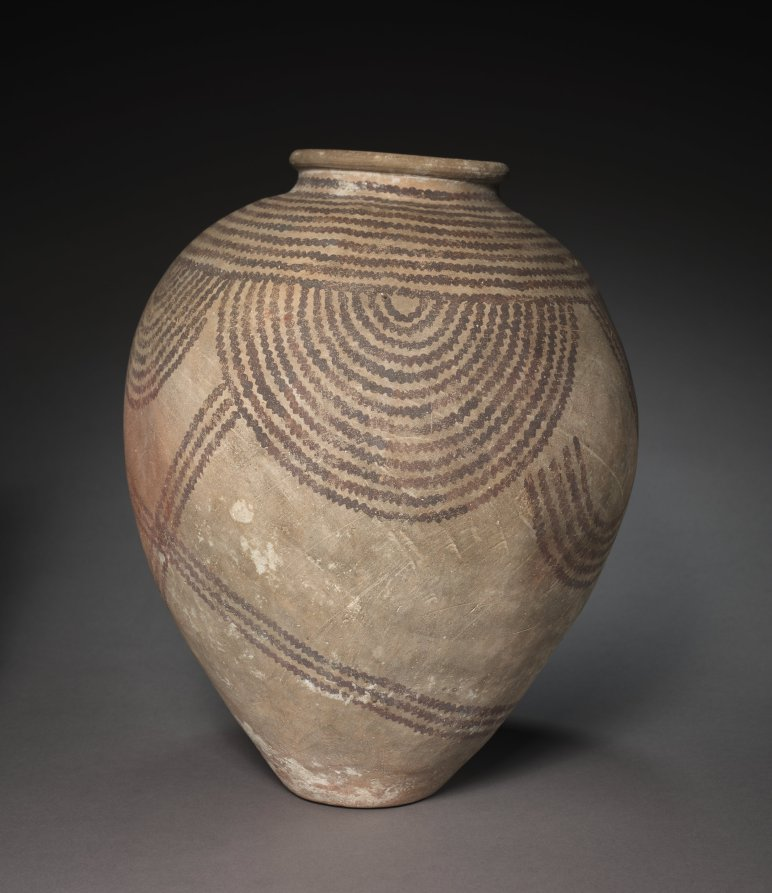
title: Decorated Jar with Rope Pattern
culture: Egypt, Predynastic (5000–2950 BCE), Naqada IId (3650–3300 BCE)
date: 4000–3000 BCE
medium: marl clay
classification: Vessels